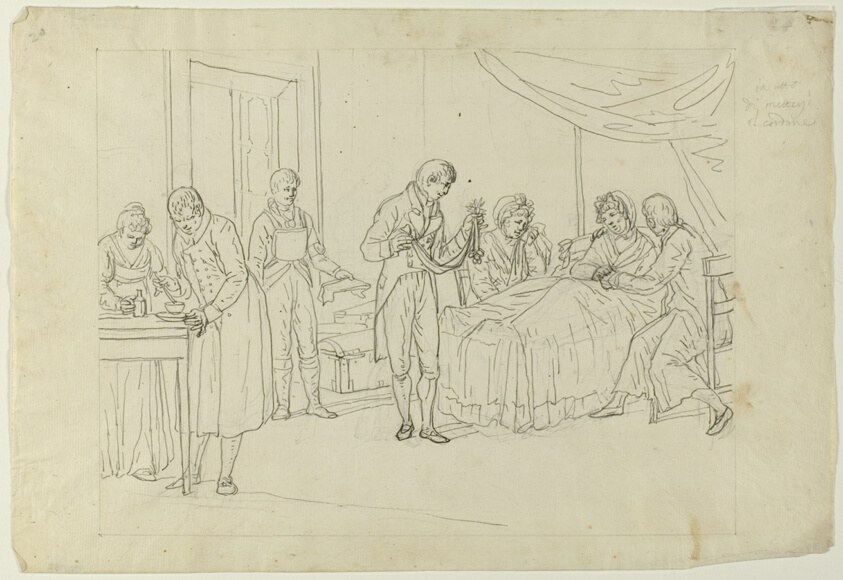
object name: Drawing and Watercolor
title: Sickbed Scene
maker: Attributed to Saverio della Gatta; Italian, active 1777-1811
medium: Pen and black ink, over traces of graphite, on cream laid paper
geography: Italy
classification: pen and ink drawings; drawings (visual works); prints and drawing